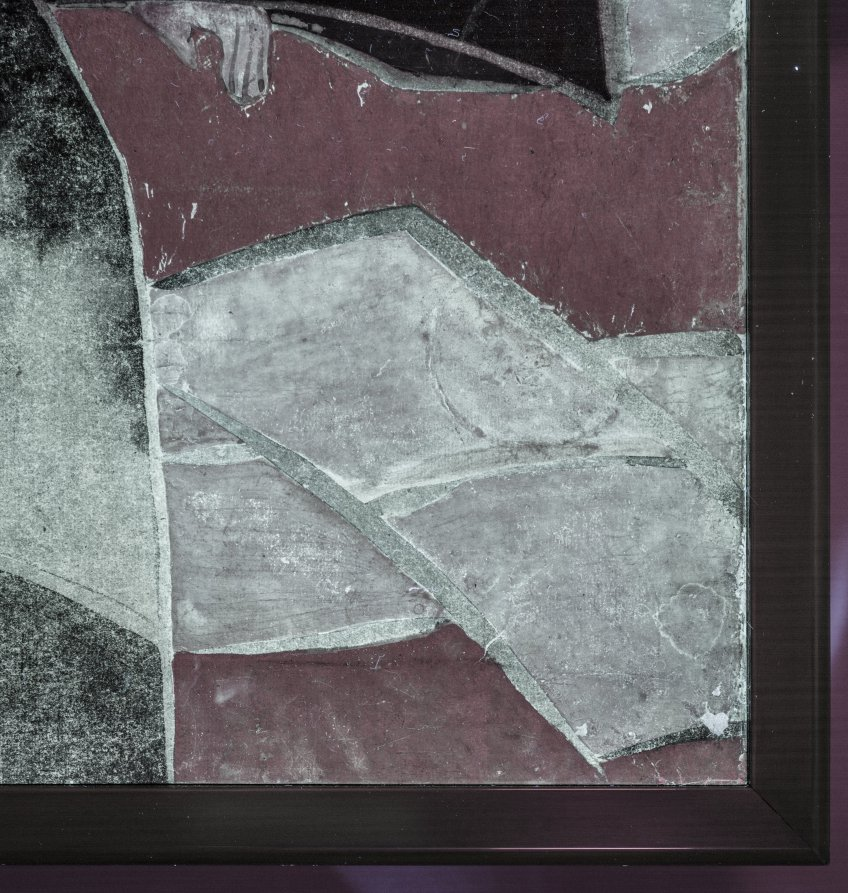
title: Thirty-Six Poetic Immortals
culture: Japan, Edo period (1615–1868)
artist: attributed to Tatebayashi Kagei (Japanese, active mid-1700s)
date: mid 1700s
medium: two-fold screen; ink, color, and gold on paper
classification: Painting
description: Fujiwara no Kintō (996–1075), a Japanese courtier, scholar, and poet, compiled select examples by the most celebrated composers of 31-syllable poems (waka) from the 600s to the 1000s. Painters soon made these “thirty-six poetic immortals” a favorite subject, traditionally presenting the poets in sequential, idealized portraits paired with their poems. In this interpretation, a chronologically impossible gathering of these great talents is in progress. The screen’s composition follows one devised by design virtuoso Ogata Kōrin (1658–1716).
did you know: The green surface edged with stripes at the upper left of the painting represents tatami matting with a silk border.